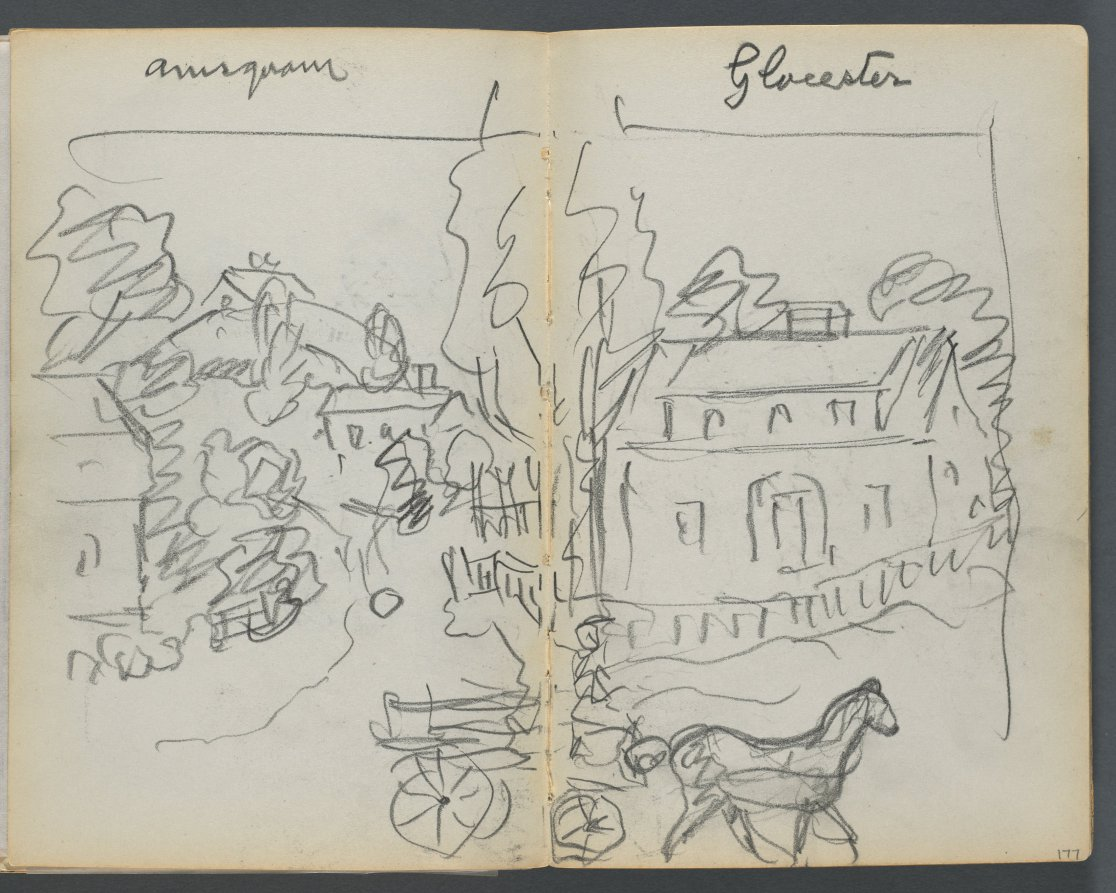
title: Sketchbook, The Dells, N° 127, page 176 & 177: "Annisquam - Glocester"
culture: America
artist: Maurice Prendergast (American, born Newfoundland [now Canada], 1858–1924)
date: c. 1919–1921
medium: graphite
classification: Bound Volume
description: This sketchbook contains 59 pages of graphite drawings and 16 watercolors made at various locations on Cape Ann, Massachusetts.